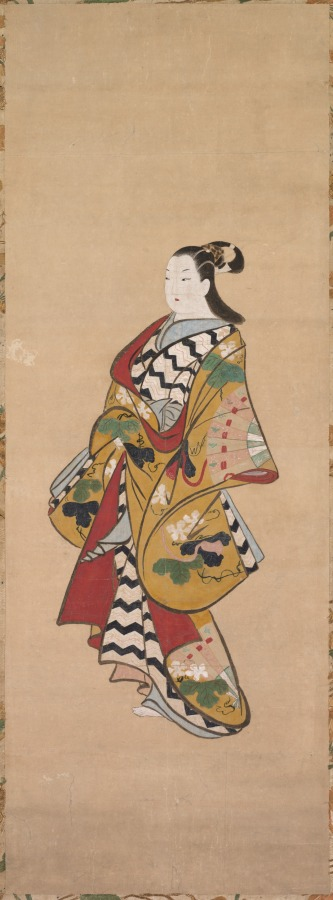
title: Courtesan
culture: Japan, Edo period (1615–1868)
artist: studio of Kaigetsudō Ando (Japanese, c. 1671–1743)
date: 1700s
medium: hanging scroll; ink and color paper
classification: Painting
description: Paintings of the courtesans who provided men with a sophisticated menu of appealing fashions, flattery, witty banter, music, dancing, and sexual services in the Yoshiwara district of the city of Edo (Tokyo) were the bread and butter of the Kaigetsudō studio, in whose style this work is painted. Their paintings emphasized bold, sweeping calligraphic ink lines in rendering the figures’ forms, along with high-contrast colors and patterns in their typically solitary subjects’ garments. Aside from the occasional prop or poem, the space around the dramatic figure was left entirely blank.